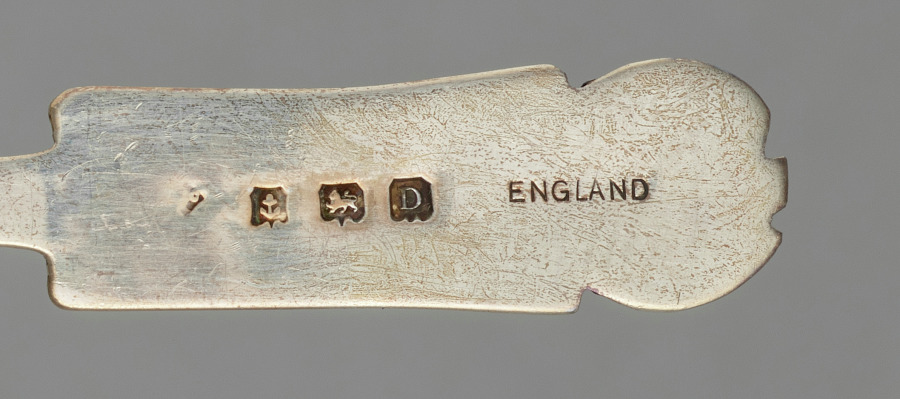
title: Set of six Spoons in Original Box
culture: England, London, 19th century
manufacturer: Liberty and Company (British)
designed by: attributed to Archibald Knox (British, 1864–1933)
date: c. 1895–1910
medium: Silver, enamel decoration and leather box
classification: Silver